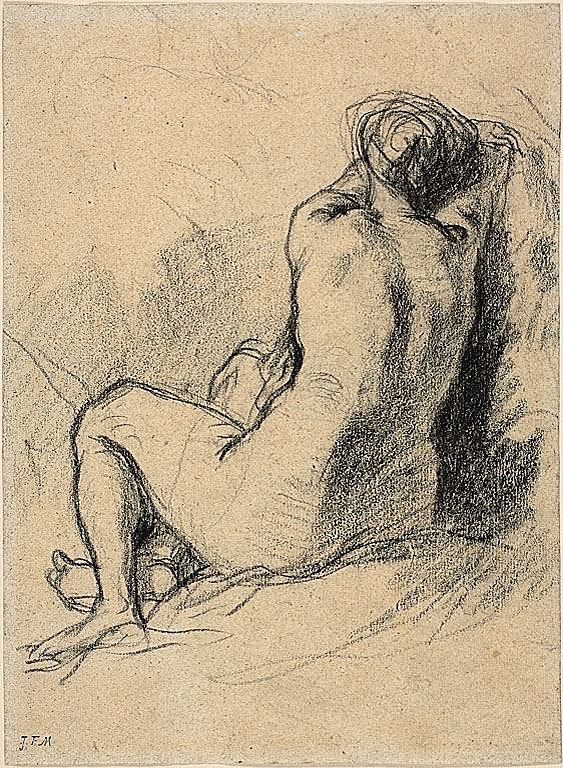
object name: Drawing and Watercolor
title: Study: Nude Woman Seen from the Back (recto) Sketches of Peasants Working (verso)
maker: Jean François Millet (French, 1814-1875)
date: c. 1846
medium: Black crayon on gray laid paper, with blue fibers (discolored to buff with tan and blue fibers)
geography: France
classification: crayon; drawings (visual works); prints and drawing